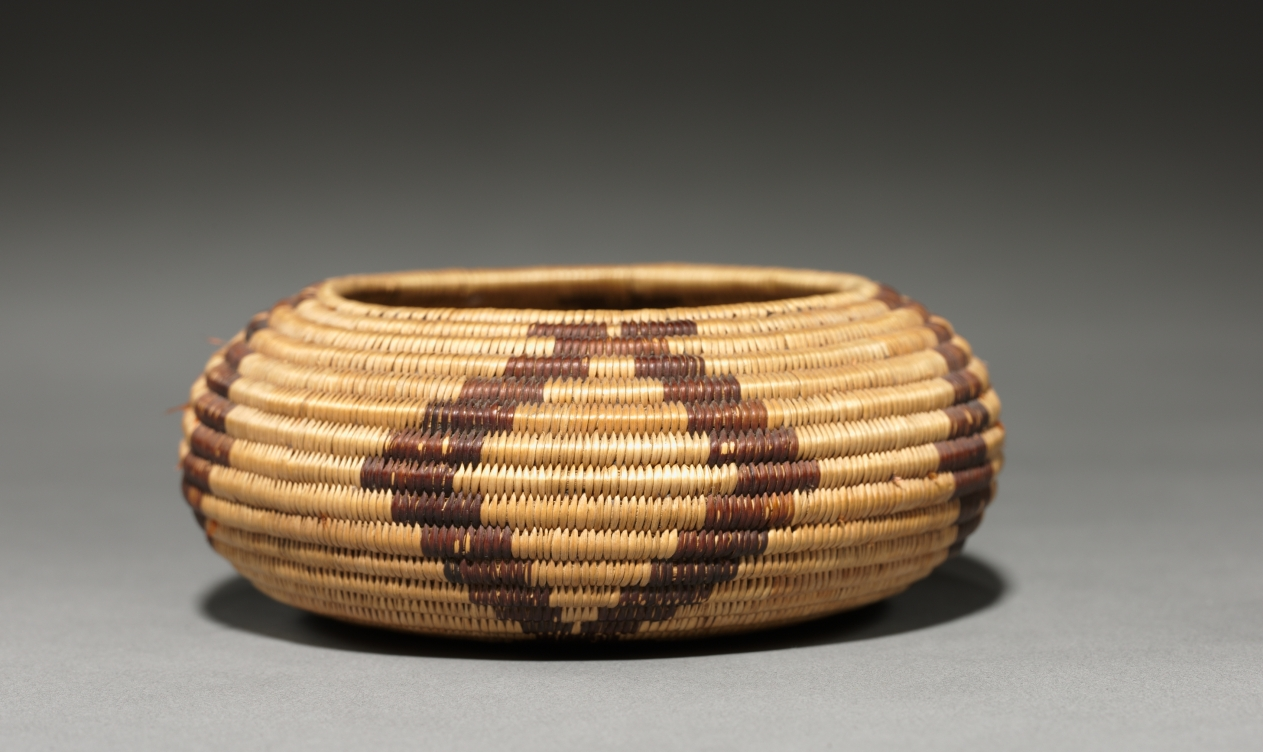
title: Bowl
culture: California, Pomo, Late 19th- Early 20th century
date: 1890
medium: Undyed Bulrush, Sedge; Coiled (3 rods)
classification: Basketry